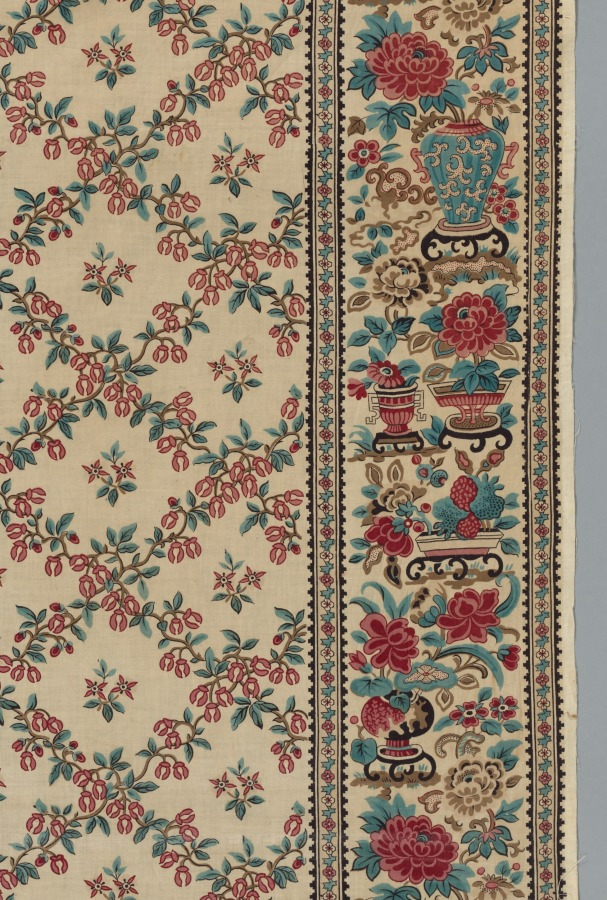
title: Roller-Printed Glazed Chintz with Flower and Vase Design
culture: England, 19th century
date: 1800s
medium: roller printed cotton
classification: Textile